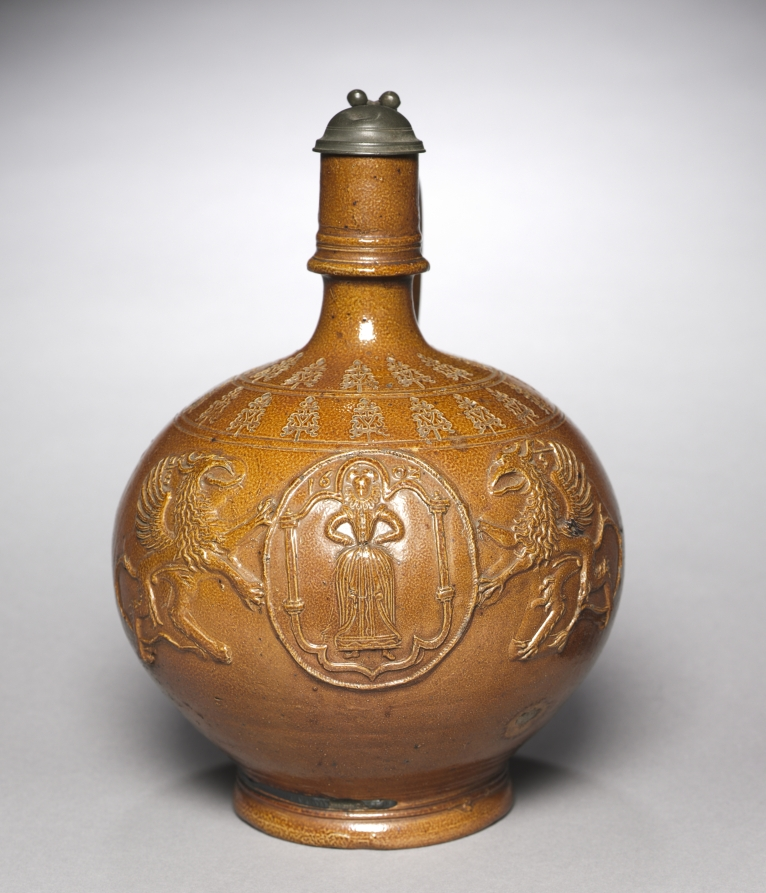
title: Jug with Pewter Lid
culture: Germany, Raeren, 17th century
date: 1602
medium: stoneware, brown glaze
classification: Ceramic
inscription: above the figure of a woman: 1602; above the left griffin: G / E ; above the right griffin: V / S.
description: German Stoneware The production and export of German stoneware reached its peak in the late 1500s. Prized for its durability and stone-like appearance, German stoneware became one of the most widely traded forms of pottery, even finding popularity in early America. The distinctive pebbly glass surface, resembling an orange peel, was achieved by introducing salt into the hot kiln during the firing process. This glaze gave clear definition to the coats of arms or other emblems that often formed the surface decoration on large works, usually jugs.